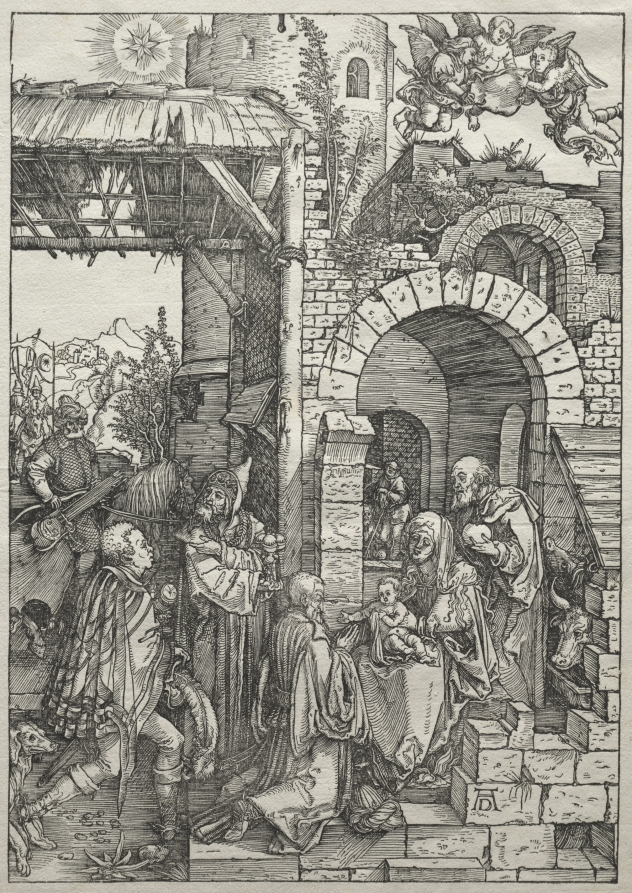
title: Life of the Virgin: Adoration of the Magi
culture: Germany, early 16th Century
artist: Albrecht Dürer (German, 1471–1528)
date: 1504–1505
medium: woodcut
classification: Print